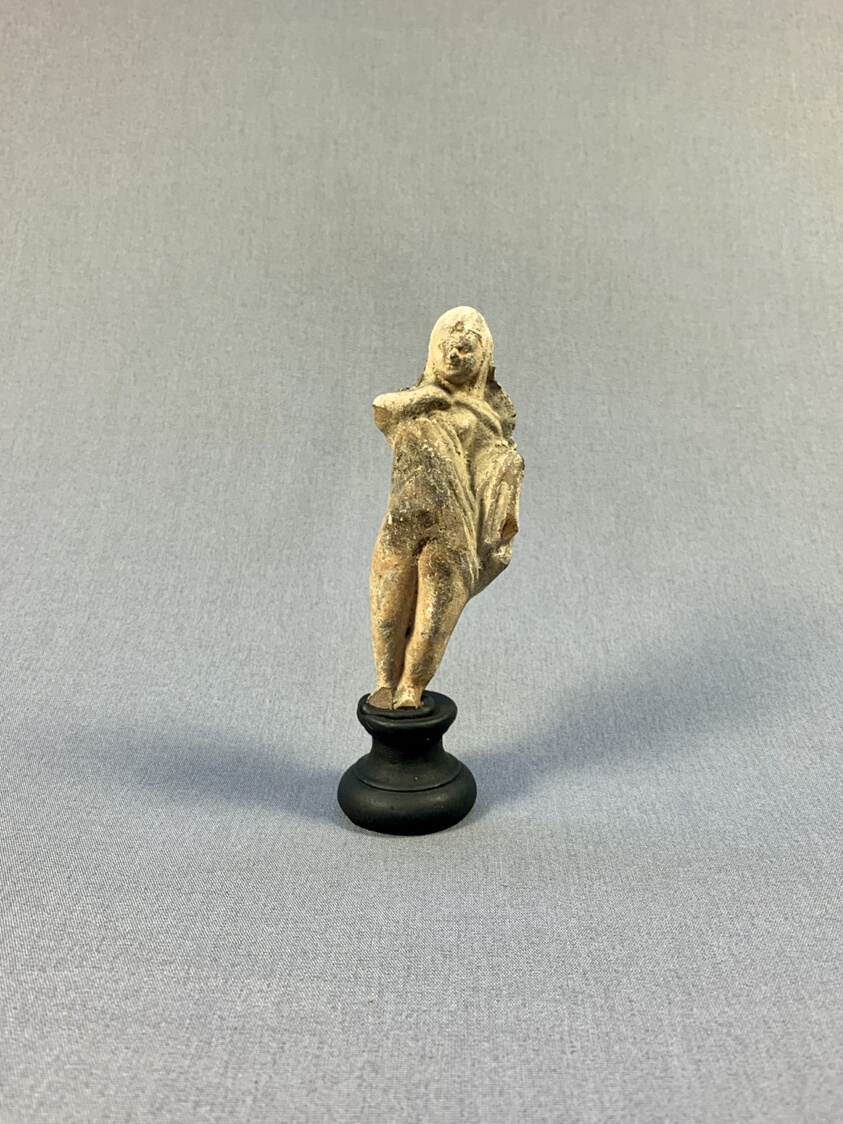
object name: Sculpture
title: Figurine of a Female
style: greek, ancient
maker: Greek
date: 3rd-2nd century BCE (?)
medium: terracotta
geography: Greece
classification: earthenware; ceramics; sculpture; ancient art